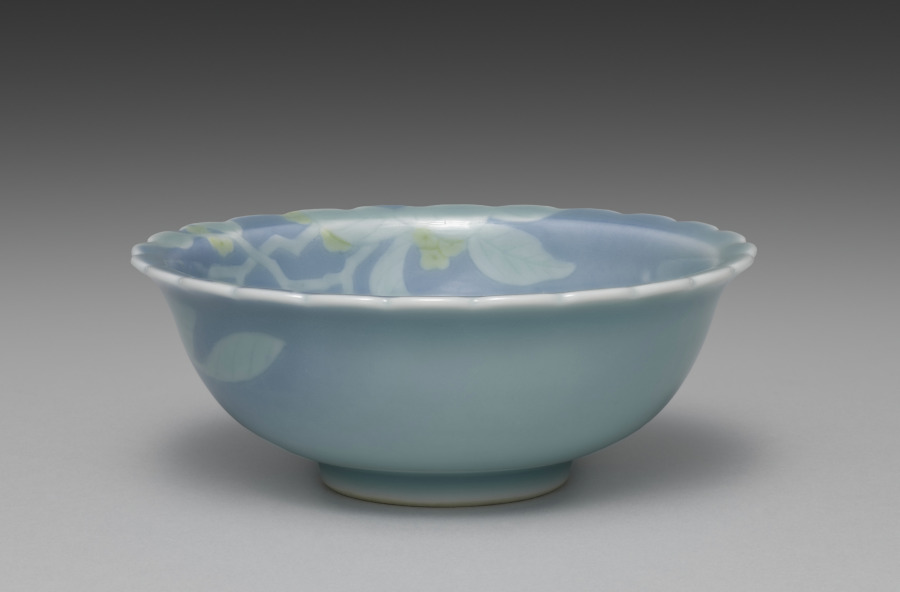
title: Dish from Dishes with Flowers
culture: Japan, Taishō period (1912–26) or Shōwa period (1926–89)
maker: Seifū Yohei IV (Japanese, 1872–1951)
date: 1914–46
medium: One from a set of five dishes; porcelain with underglaze yellow and blue glaze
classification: Ceramic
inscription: 清風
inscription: 清風造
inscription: 成山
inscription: 清風盧人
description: One can imagine a cool summer breeze when looking upon this set of dishes, each shaped with a crenulated mouth and glazed with blue. Around the rim and into the basin, the bowls have low-relief designs of flowers with underglaze yellow petals; their leaves and stems show white through the glaze. On each dish, the design continues over the rim onto one side.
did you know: Seifū Yohei IV’s dishes with flowers feature underglaze yellow.